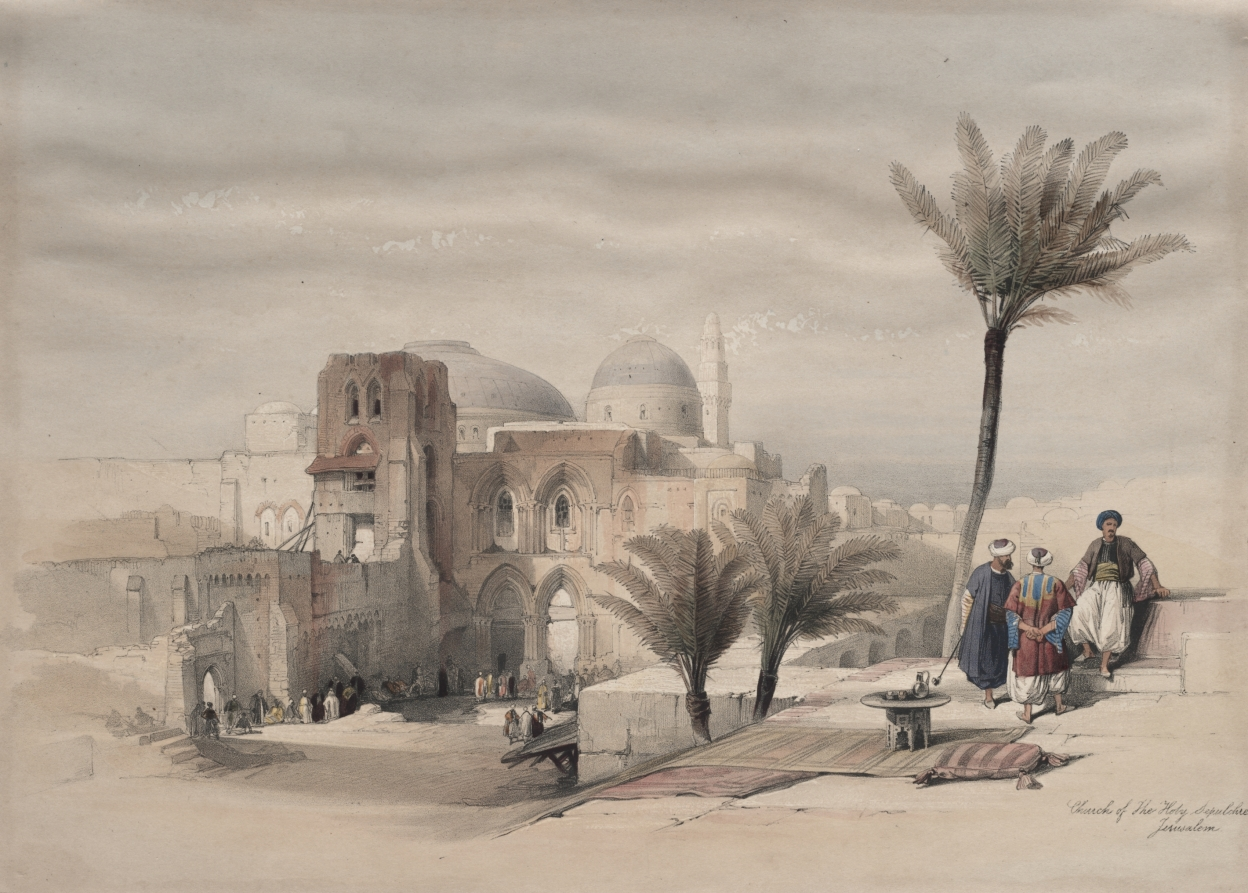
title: Church of the Holy Sepulchre, Jerusalem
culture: England, 19th century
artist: David Roberts (Scottish, 1796–1864)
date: 1839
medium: color lithograph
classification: Print